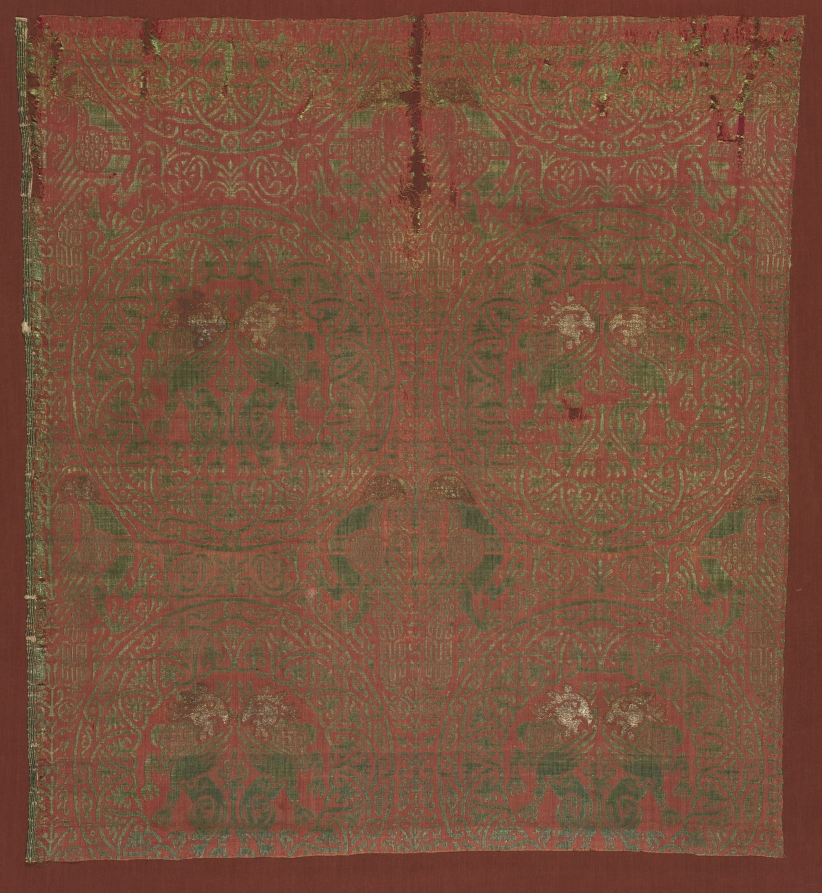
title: Silk Fragment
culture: Spain, Islamic period or Mudejar, 13th century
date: 13th century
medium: lampas weave, brocaded; silk and gold thread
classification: Textile